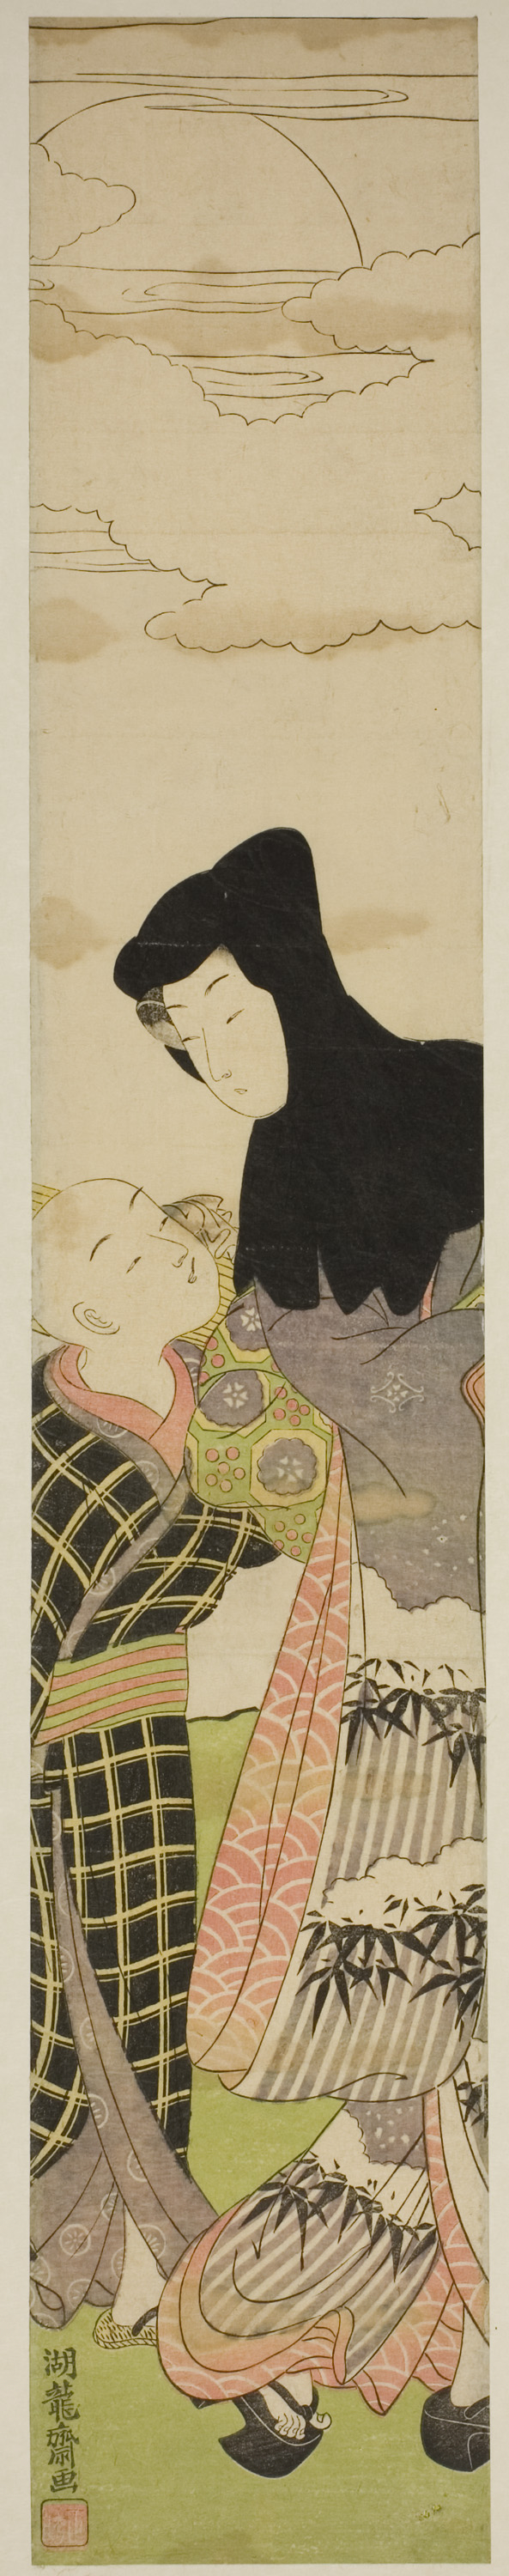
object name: Print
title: Woman Wearing Black Hood Speaks to Young Boy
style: Japanese (culture or style)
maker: Isoda Koryusai (Japanese, 1735-1790)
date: c. 1772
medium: Color woodblock print; hashira-e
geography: Japan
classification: woodblock print; print; asian art